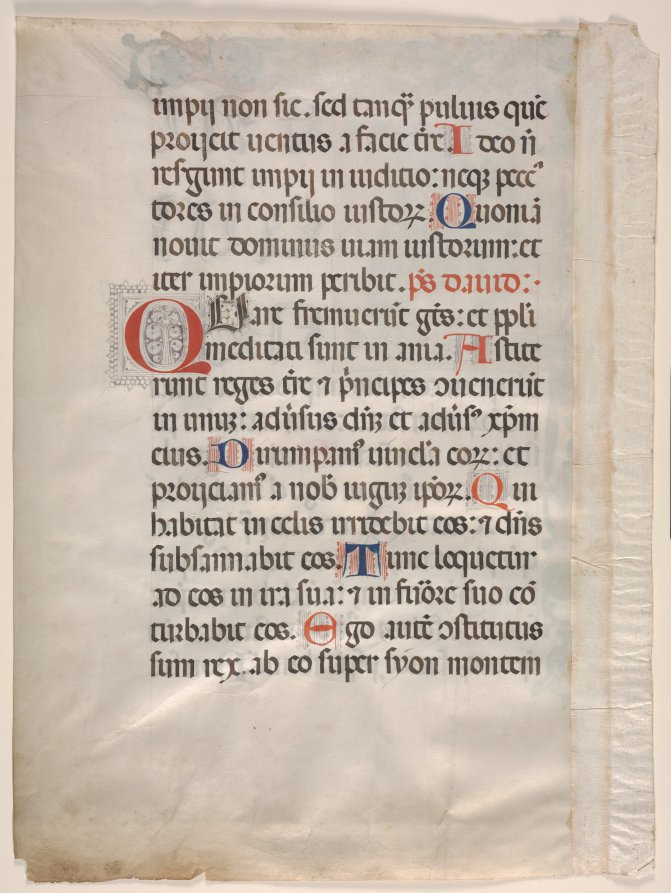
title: Leaf from a Choir Psalter: Initial B with King David in Prayer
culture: Northern Italy, Lombardy and the Veneto, 15th century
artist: Maestro del Messale Barbo (Italian)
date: c. 1460–1470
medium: ink, tempera and gold on vellum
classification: Manuscript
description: Psalters contained all 150 biblical psalms. Specific pages within the psalter were decorated with historiated initials to highlight the liturgical divisions. In addition to providing embellishment, such initials served as a visual aid to the user to assist in locating a text. The most prominent of these was Psalm 1, which begins Beatus vir qui non abiit in consilio impiorum (Blessed is the man who has not walked in the counsel of the ungodly), and which traditionally featured the grandest initial of all. An enlarged B was customarily filled with a scene representing King David, the author of the Psalms. Here David kneels in prayer within a bright green landscape of craggy rocks and trees. Above, God the Father, with orb in hand, looks down from heaven as he blesses David with his right hand. The author of the initial is named after a missal he illuminated for Marco Barbo, Bishop of Treviso, from 1455 to 1464 (now in Padua). He worked mainly in Lombardy and the Veneto during the 1450s and 1460s, and manuscripts illuminated by him are known to have been destined for patrons in Brescia and Padua.